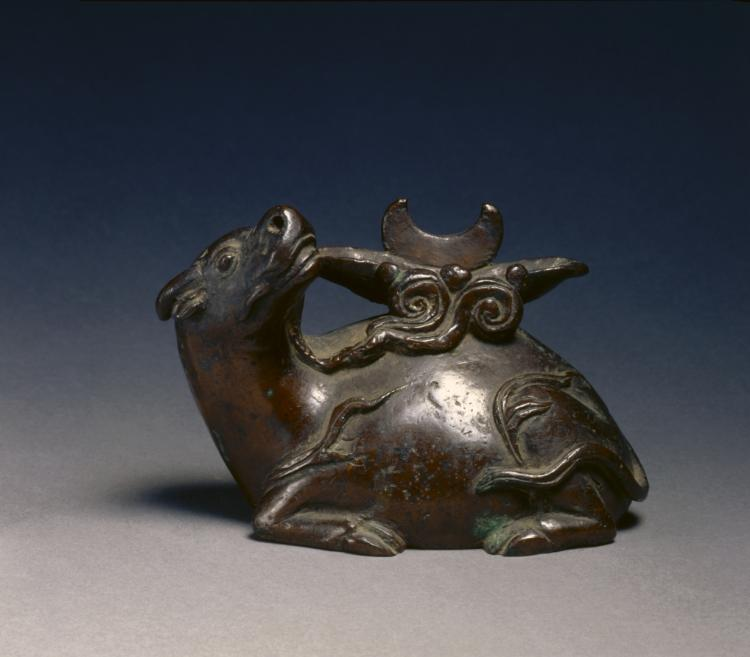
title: Mirror Stand in the Shape of an Ox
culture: China, Qing dynasty (1644-1911)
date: 1644–1911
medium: bronze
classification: Metalwork